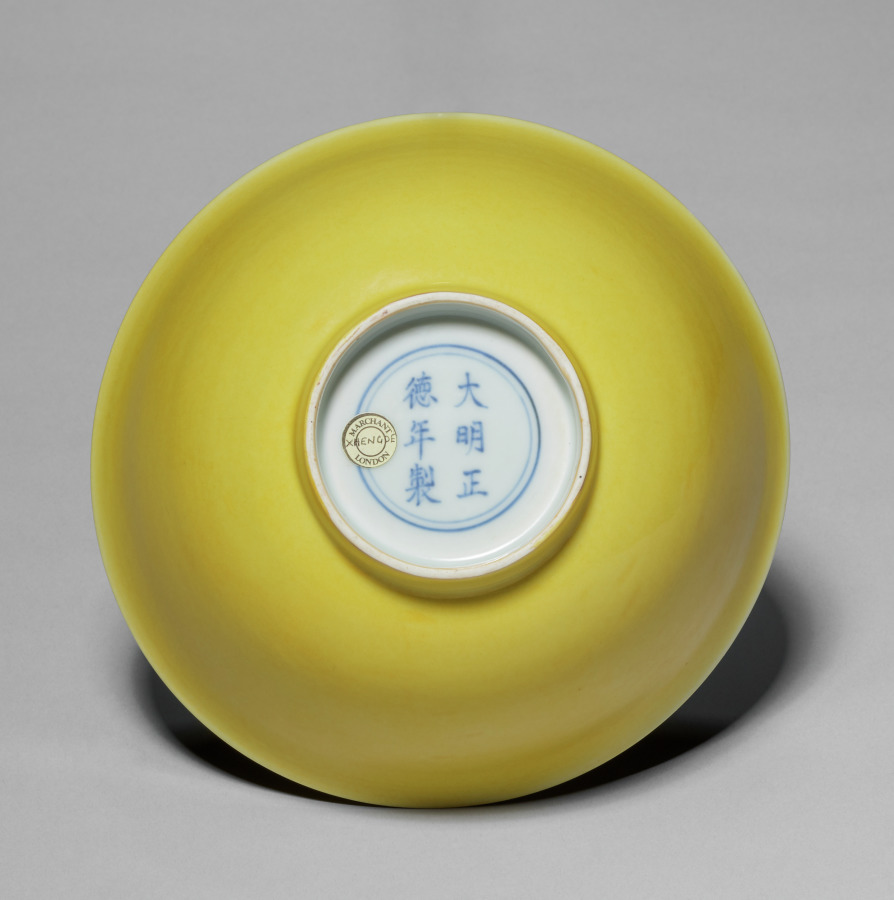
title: Yellow-Glazed Bowl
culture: China, Jiangxi province, Jingdezhen kilns, Ming dynasty (1368–1644), Zhengde mark and reign (1505–21)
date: 1505–21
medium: Porcelain with monochrome yellow glaze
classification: Ceramic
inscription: 大明正德年製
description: Monochrome yellow–glazed porcelain appears first during the Ming dynasty and is the combined result of technological advancement, the requirements of state rituals, and aspirations of taste. The base bears a mark of the Zhengde (正德) reign period, renowned for its high-quality imperial porcelain, and a pleasure-seeking emperor who died in his youth. Imperial marks were permitted to be applied only by Jingdezhen workshops affiliated with the court. Most scholars believe that yellow monochrome ware was reserved for the use of the imperial household or served as diplomatic gifts. The color is therefore often called “imperial yellow.”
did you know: Zhengde–marked bowls of this so-called imperial yellow type are also preserved in the National Palace Museum in Taipei and the Topkapi Saray, Istanbul, once the palace of the Ottoman sultans.